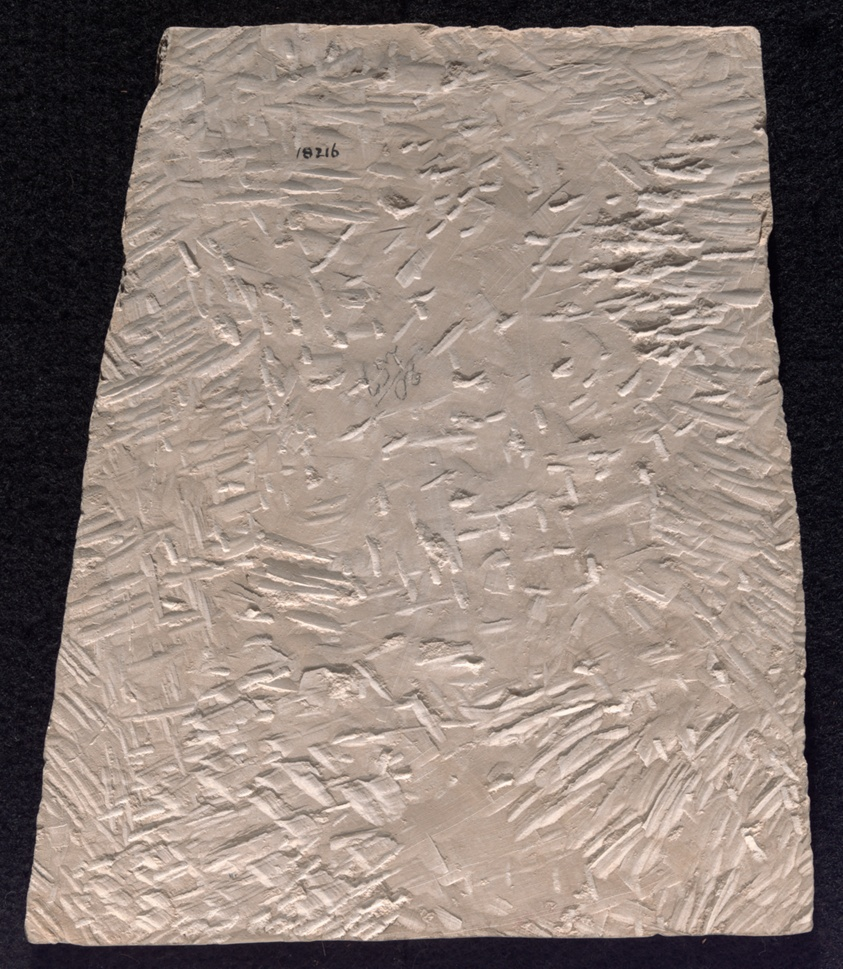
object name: Architectural fragment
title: Relief Depicting a God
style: ptolemaic, greco-roman (egyptian), ancient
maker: Egyptian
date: Ptolemaic Period (332–30 BCE)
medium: Limestone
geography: Egypt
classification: relief; stone; sculpture; ancient art; plaque (flat object)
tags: gods (deities)